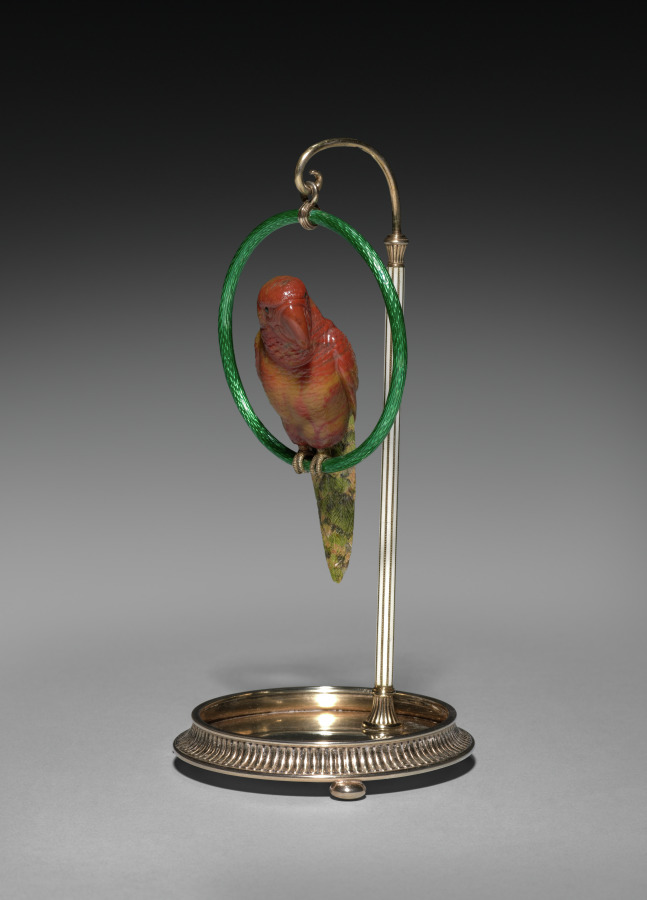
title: Parrot on a Perch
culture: Russia, St. Petersburg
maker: House of Fabergé (Russian, 1842–1918)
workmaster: Mikhail Evlampievich Perkhin (Russian, 1860–1903)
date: 1896–1903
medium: silver, enamel, jasper, agate, emeralds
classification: Miscellaneous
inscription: 88, Kokoshnik, tester's initials (in Cyrillic) [assay mark for St. Petersburg, 1896-1908]; initials of workmaster Mikhail Perkhin (in Cyrillic); Fabergé (in Cyrillic); 6817 scratched.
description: In creating luxurious accessories for a desk or tabletop, Fabergé often used native hardstones such as multicolored agate and jasper, green nephrite, pink rhodonite, and rock crystal found in the Ural Mountains of western Russia. By paying careful attention to the unique colors and textures of the stones, Fabergé and his craftsmen brought them to life, turning milky agate into a begging poodle or green and black jasper into this parrot sitting on a perch. The use of native materials also promoted Russian nationalism, which appealed greatly to the tsar and his family.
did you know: Tsar Nicholas and his cousins in the British royal family kept parrots and parakeets throughout their many palaces.